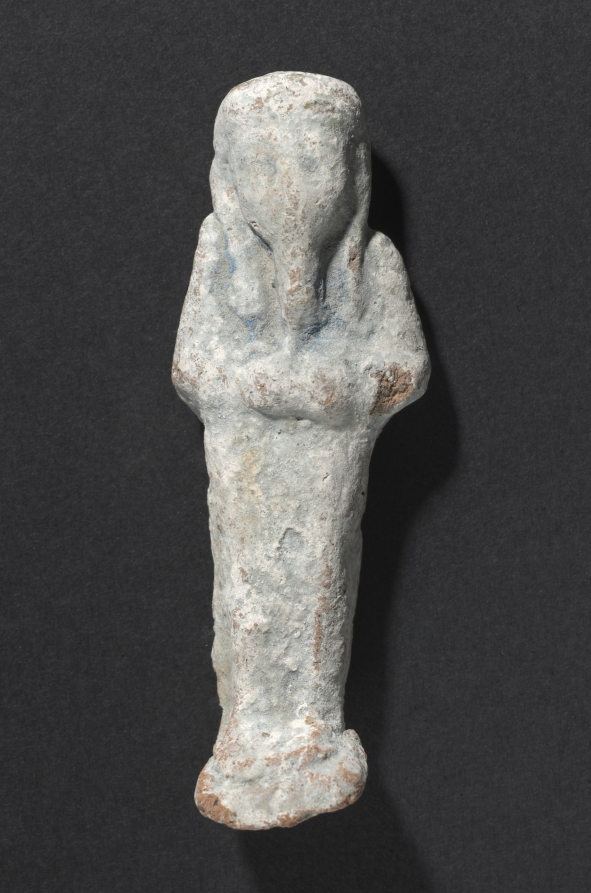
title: Shawabty of Ditamenpaankh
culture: Egypt, Late period (715–332 BCE), Dynasty 25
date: 715–656 BCE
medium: terracotta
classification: Funerary Equipment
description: High demand for shawabtys in the Late Period, a time when as many as 400 or more shawabtys were placed in the tomb with the deceased, gave rise to a specialized container for storing them: the shawabty box. This example is inscribed for the lady of the house, Ditamenpaankh, and was probably one of a pair originally made for her. The single-masted boat on the box's lid is perhaps an allusion to the pilgrimage of the deceased to the holy city of Abydos, the cult city of Osiris, king of the dead. The shawabtys inside are crude, mass-produced examples cast in an open mold. Made of terracotta, their blue paint imitates more costly shawabtys made of faience. As for the shawabty spell, it has been removed from its traditional location on the shawabty's front and relocated onto the sides of box, where it needed only to be written once, thus expediting production.